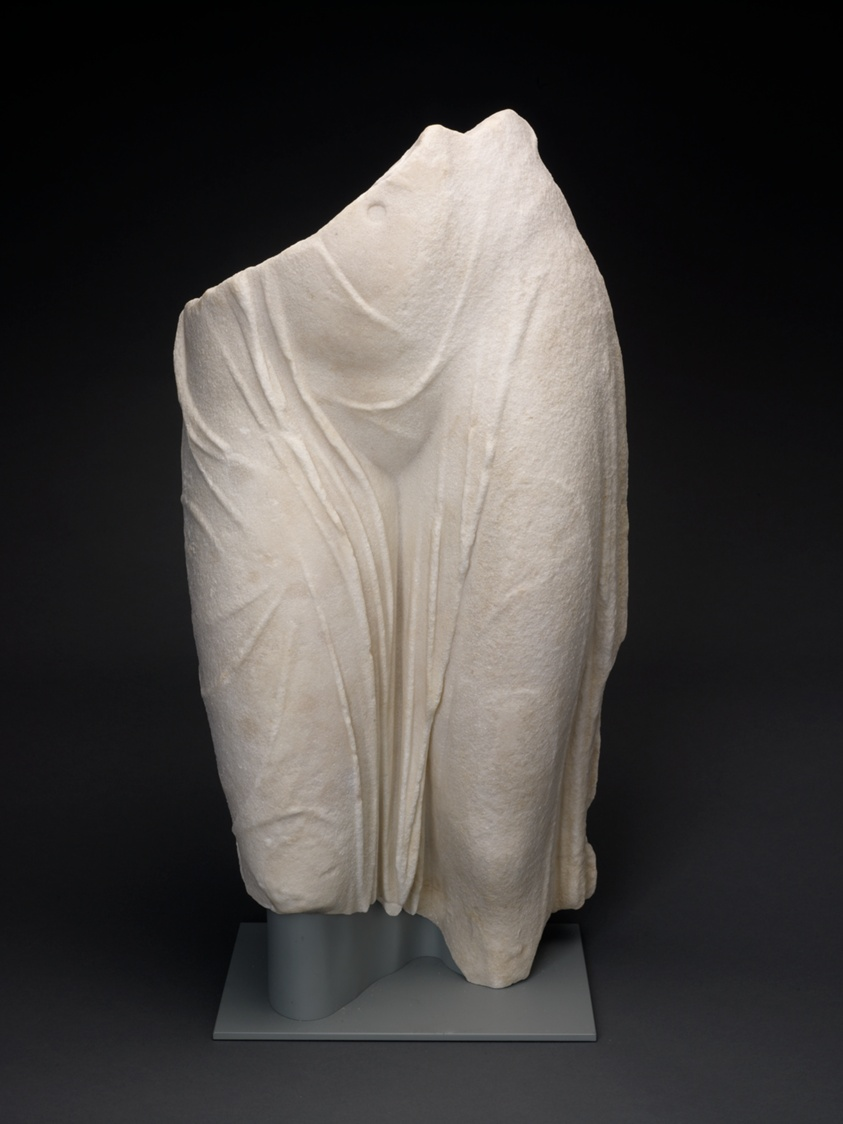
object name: Sculpture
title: Fragment of a Statue of Venus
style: roman (ancient, style or period), ancient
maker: Roman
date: 1st-2nd century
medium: Marble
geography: Italy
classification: marble; stone; sculpture; ancient art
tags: goddesses, gods (deities)